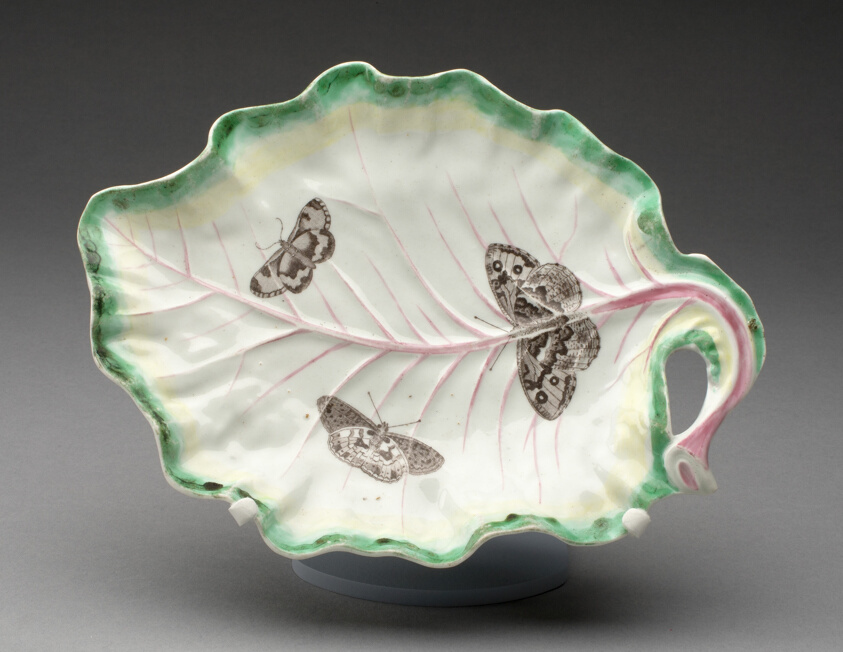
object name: Ceramics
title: Tobacco Leaf Dish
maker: Worcester Porcelain Factory (Warmstry House Period, 1751–1783); Worcester, England, founded 1751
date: c. 1760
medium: Soft-paste porcelain with polychrome enamels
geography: Worcester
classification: dish (vessel); tableware; porcelain; european decorative arts; ceramics